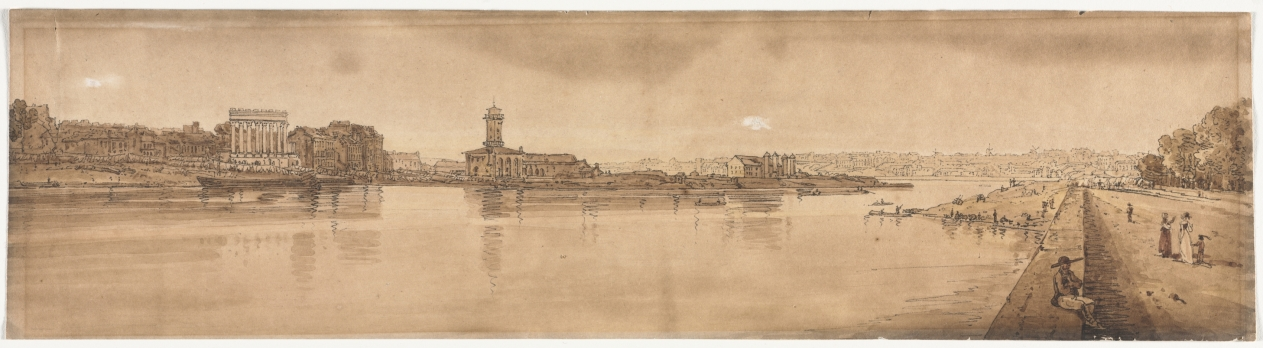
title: A Selection of Twenty of the Most Picturesque Views in Paris: View of the Village of Chaillot, taken from Pont de la Concorde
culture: England, early 19th Century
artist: Thomas Girtin (British, 1775–1802)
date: 1802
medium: soft-ground etching with bistre wash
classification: Print